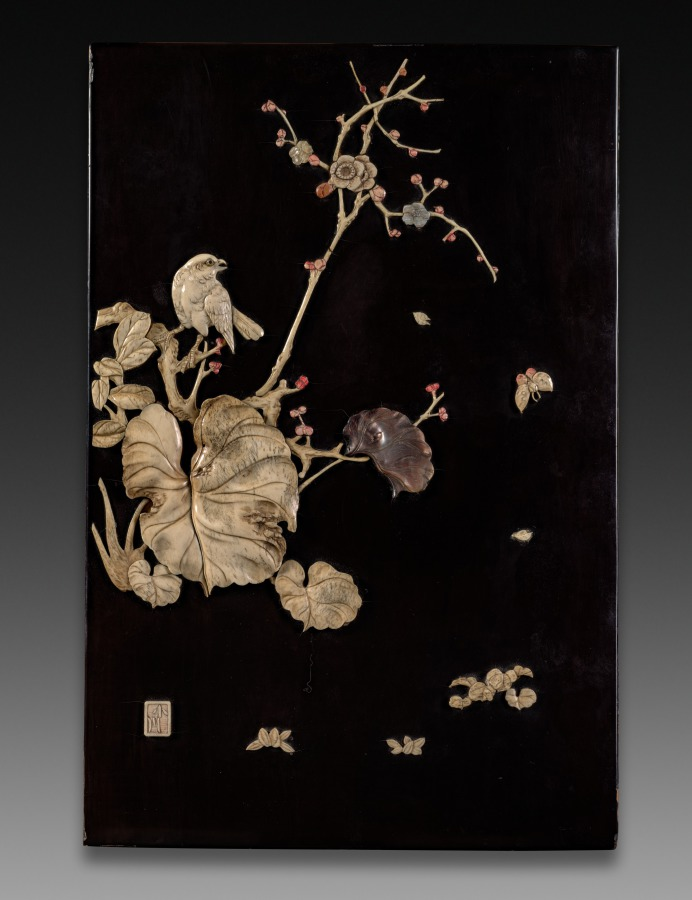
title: Decorative Panel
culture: Japan, Edo period (1615–1868) to Meiji period (1868–1912)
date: 1800s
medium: lacquer, ivory, shell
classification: Lacquer